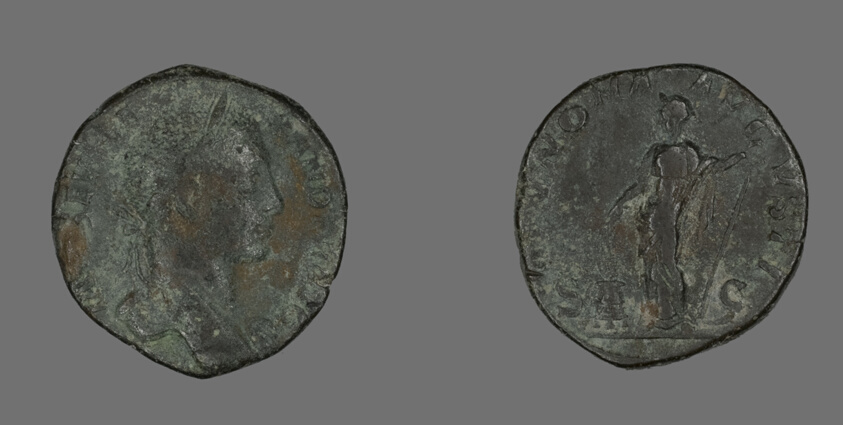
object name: Coin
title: Sestertius (Coin) Portraying Emperor Severus Alexander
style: roman (ancient, style or period)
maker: Roman, minted in Rome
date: 222-231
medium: Bronze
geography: Roman Empire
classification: coin; ancient art